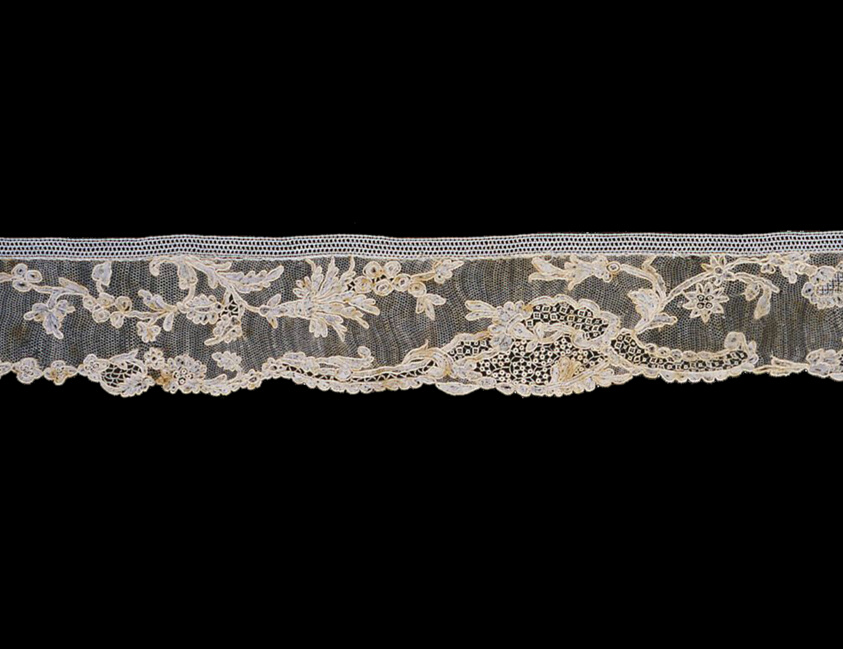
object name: Textile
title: Border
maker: France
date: 1750s/60s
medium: Linen, needle lace of a type known as "Point d'Alençon"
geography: France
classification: textile; lace - needle; lace